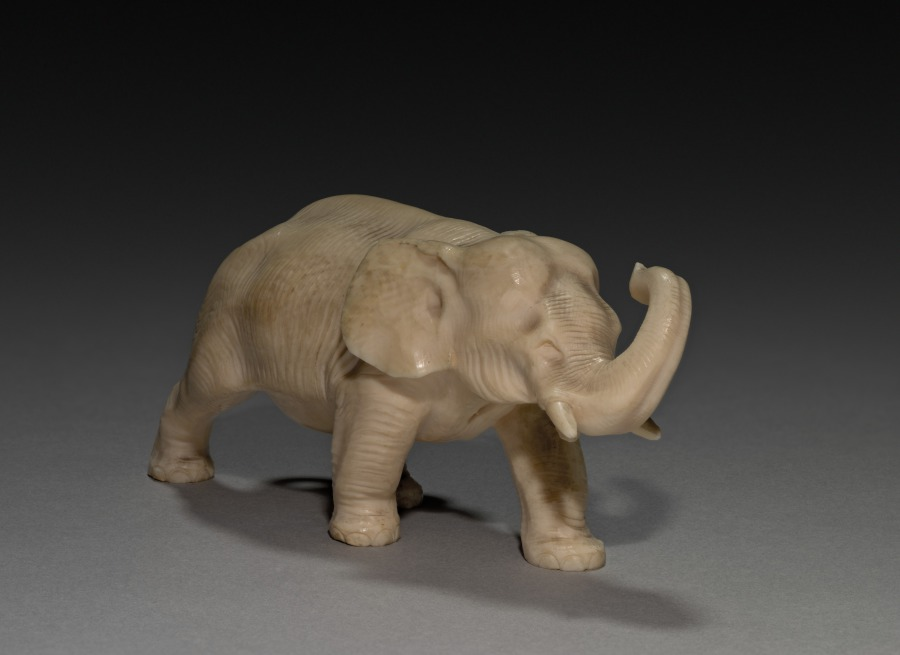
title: Elephant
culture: Japan, Meiji period (1868–1912)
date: early 1900s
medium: ivory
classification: Ivory